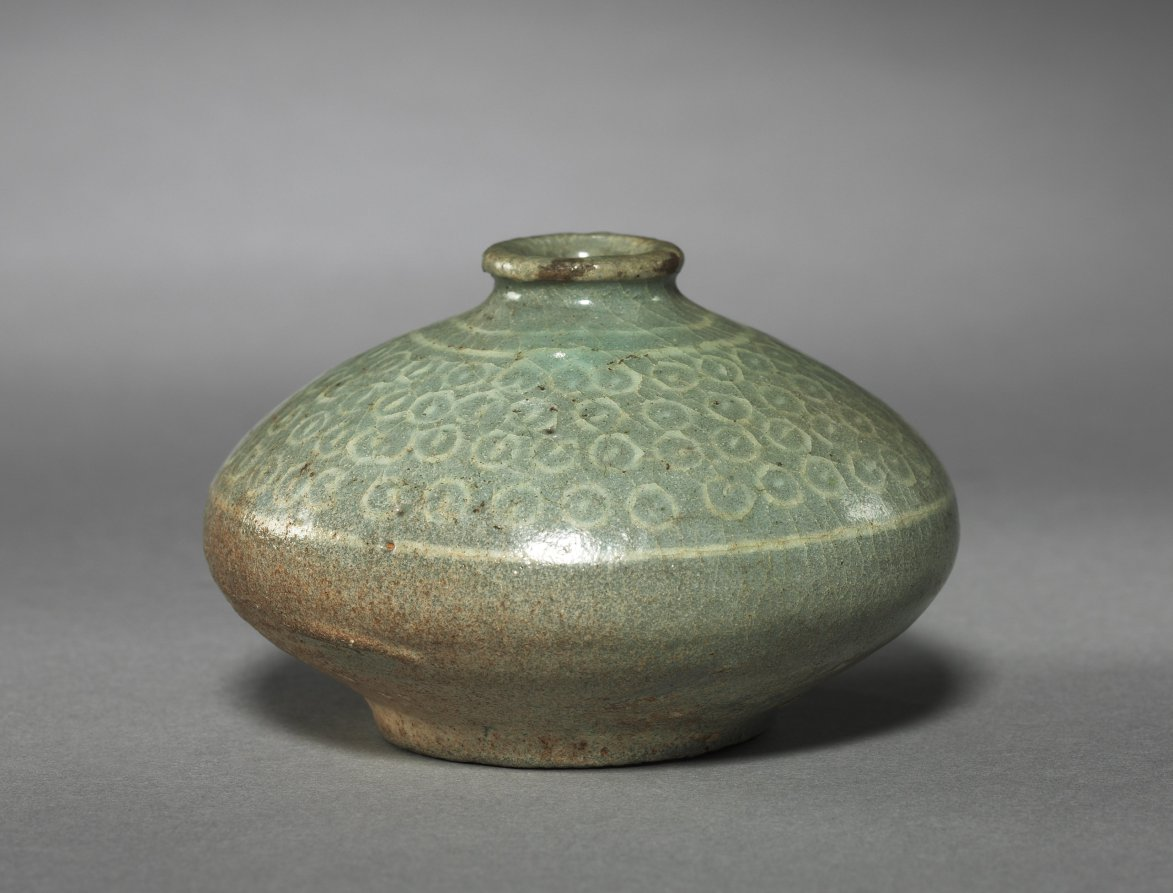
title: Oil Bottle with Inlaid Dots Design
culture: Korea, Goryeo dynasty (918–1392)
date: 1200s-1300s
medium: inlaid celadon ware (Mishima ware)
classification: Ceramic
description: Celadons, spoons, seals, and bronze mirrors were the most common burial objects in tombs during the Goryeo period (918–1392). Once used to contain oil treatment for hair, this little celadon bottle was one of the standard goods that furnished elites' tombs.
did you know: This bottle was used to contain oil treatment for hair.